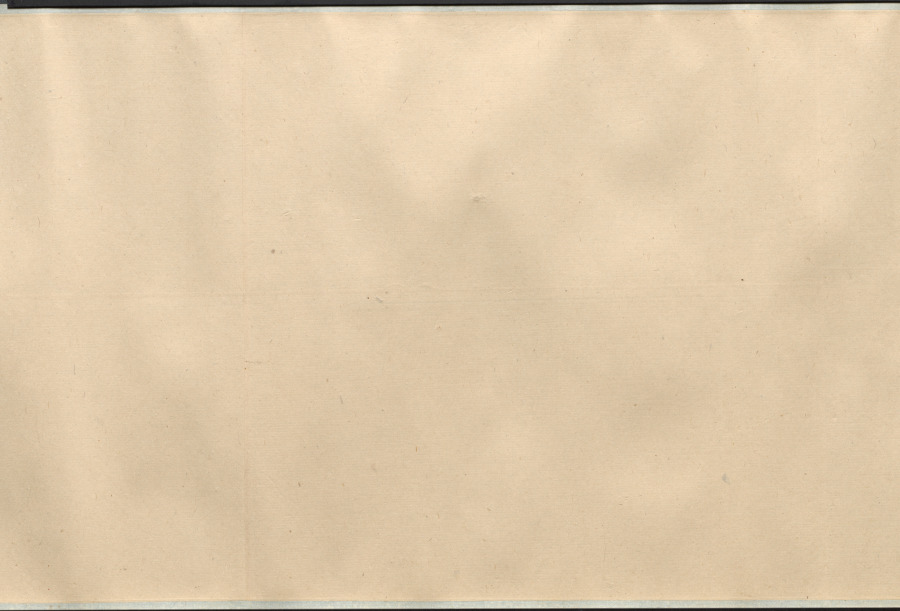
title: Rocks, Orchid, and Bamboo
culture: China, Qing dynasty (1644-1911)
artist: Shitao (Chinese, 1642–1707)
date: 1662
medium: handscroll; ink on paper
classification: Painting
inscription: Title colophon in four characters with signature and two seals on gold-flecked paper.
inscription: Artist's signature, inscription (with date of 1662), five seals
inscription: Colophon with two seals.